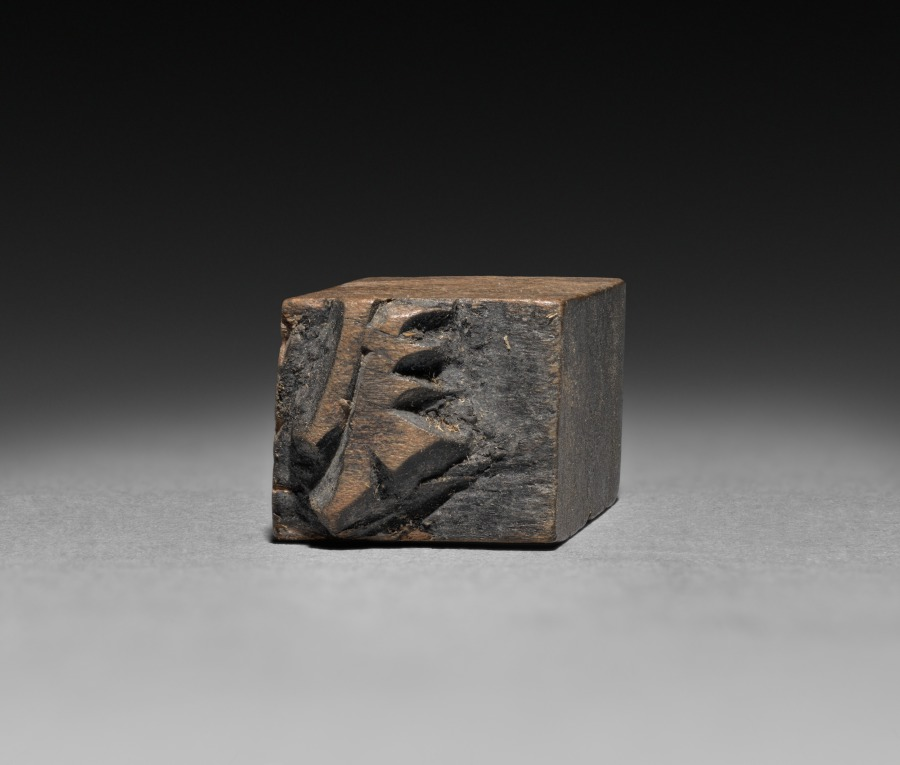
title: Wooden Moveable Type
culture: China, Nigur, 19th century ?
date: probably 1800s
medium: wood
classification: Wood